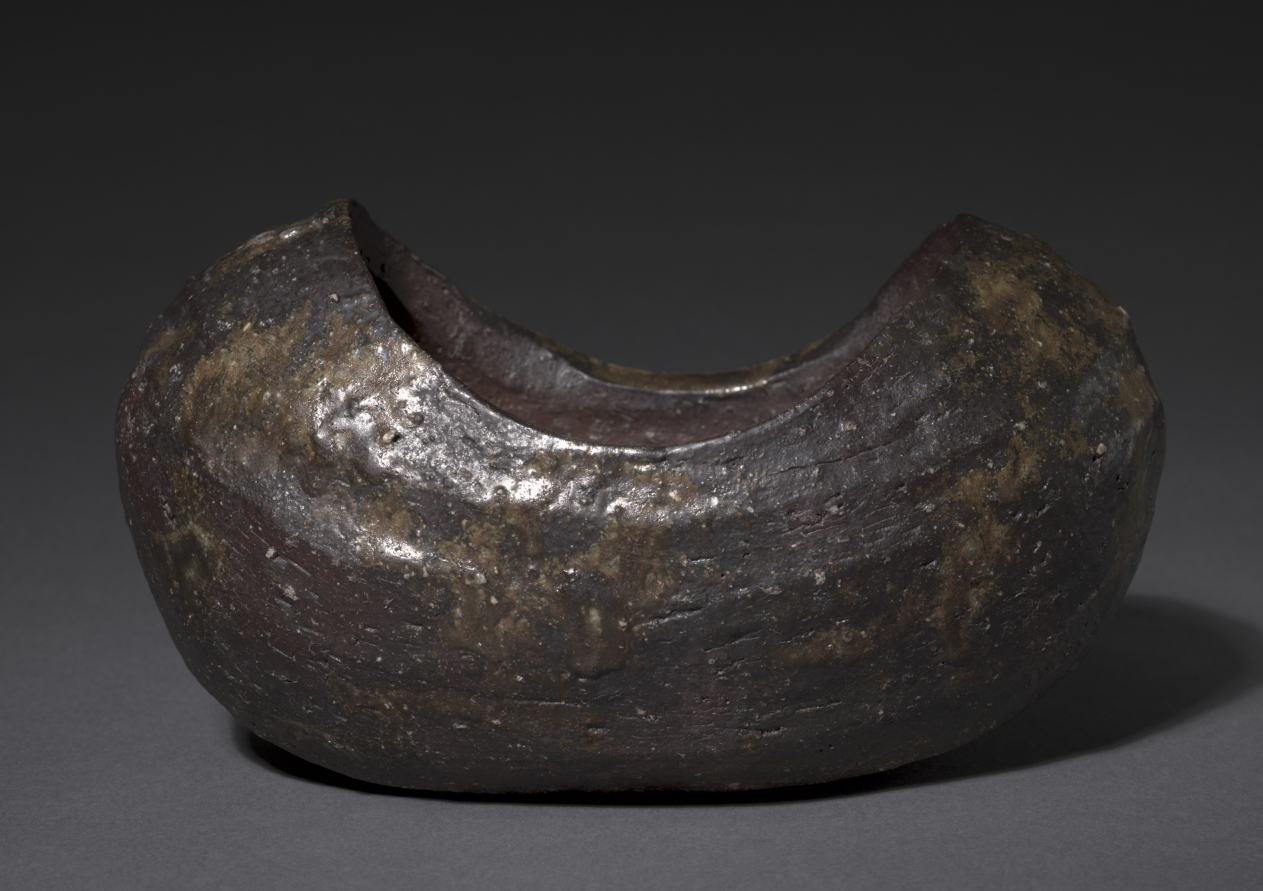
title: Flower Container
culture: Japan, Edo period (1615–1868)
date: early 1600s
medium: stoneware with natural wood ash glaze (Echizen ware)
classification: Ceramic